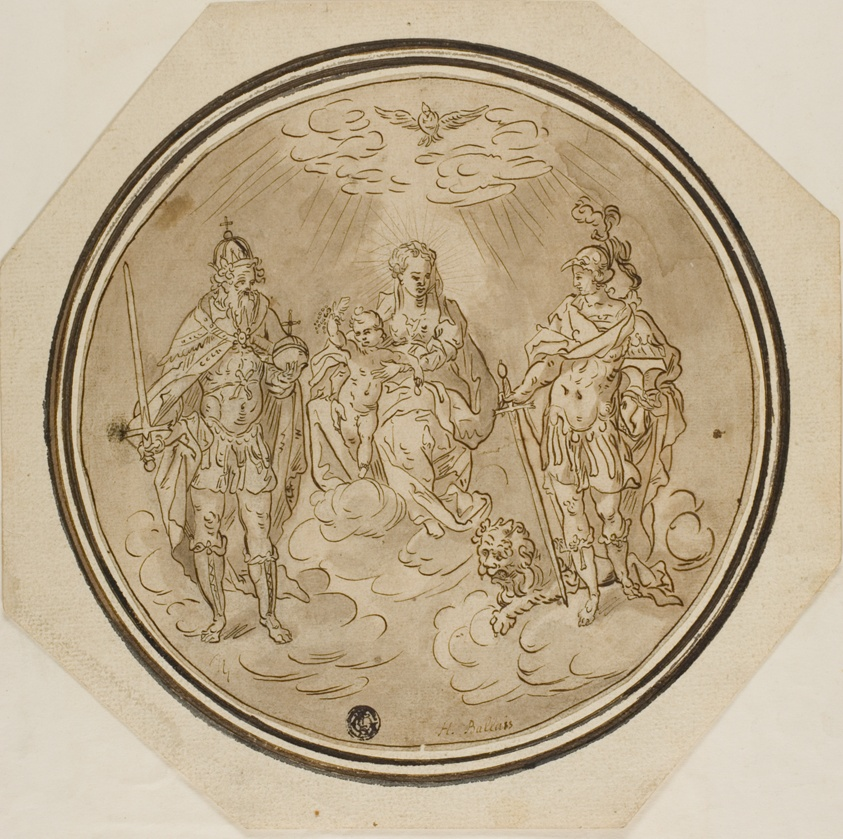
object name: Drawing and Watercolor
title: Madonna and Child with Holy Roman Emperor and Saint Adrian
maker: H. Ballais (French, 18th century)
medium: Pen and brown ink, with brush and brown wash, on roundel-shaped cream laid paper, perimeter mounted on cream laid paper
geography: France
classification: pen and ink drawings; drawings (visual works); prints and drawing